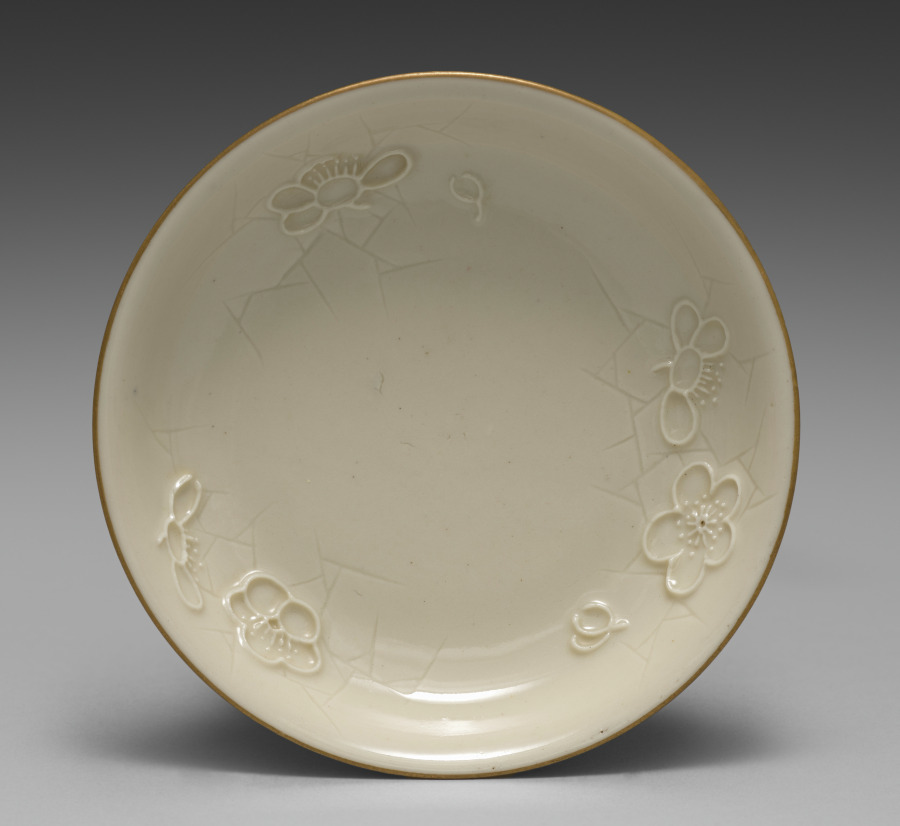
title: Small Dish from Dining Set with Plum Blossoms and Cracked-Ice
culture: Japan, Meiji period (1868–1912)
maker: Seifū Yohei II (Japanese, 1844–1878)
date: c. 1875–78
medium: Porcelain with molded designs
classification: Ceramic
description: Each item in this set has a delicate low-relief design of flowering plum branches over scattered, intersecting lines meant to resemble the cracked-ice surface of a frozen body of water and is signed on the base in gold pigment. While Yohei II produced many fine works in underglaze blue, like those produced by Kiyomizu Shichibei, he also made works in quite different styles later in his career, from the early 1870 s. In 1873, he was appointed purveyor to the Industrial Center of Kyoto Prefecture, a designation associated with Kyoto’s efforts to reach an international market through the port of Kobe; and from 1875 until his death, he was involved in national-level projects to present Japanese ceramics across the world. It was during this period that Yohei III was apprenticed to Yohei II, and it has been suggested that this set may in fact be an early example of Yohei III’s work, which he signed with his teacher’s name. Decorated with flowers resembling Japanese textile motifs, the set calls to mind the design of Yohei II’s pair of vases with plum blossoms in the Victoria and Albert Museum. Here, the elaborate trees created for a formal public exhibition setting have been translated into the approachable blossoms of the genteel domestic environment. While the designs are consistent across the pieces, each raised flower petal and pistil and each incised line in the ice was done by hand, so the cups, bowls, and dishes are similar yet unique. The bottoms of two boxes once identified the set’s owner, but the information has been deliberately obscured with black ink. However, inscriptions still visible appear to indicate two occasions, once at the end of July 1886 , and once again in June 1916 , when parts of the set were requested from Hokura in Niigata Prefecture. The location corresponds to a neighborhood in the present-day city of Jōetsu. The surname Tsuji 辻 also appears on a paper tag affixed to one of the box cloths. Future research may possibly reveal more about their provenance. A vase by Yohei III in a private collection combines the formal grandeur of the Yohei II vases in the Victoria and Albert Museum with the gentler design of this dining set, placing flowering plum trees against soft, scalloped-edge clouds resembling those in golden screens.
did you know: The dining wares have a creamy white coloration that the four boxes containing them identify as Korean in style.